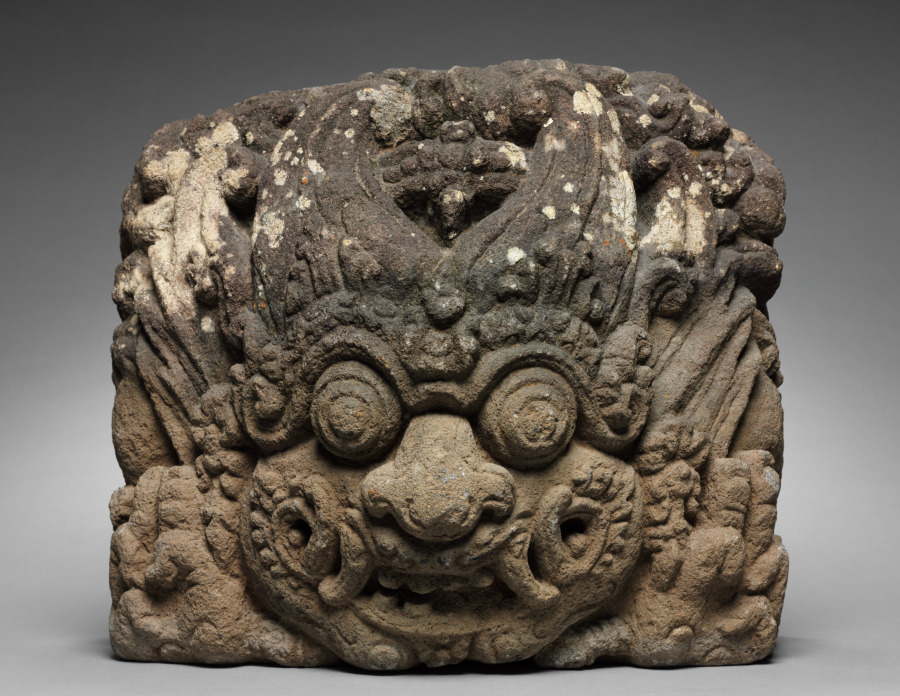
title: Architectural Sculpture: Face of Time (Kala-mukha)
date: 1100s–1300s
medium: volcanic stone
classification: Sculpture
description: The bulging eyes and curved fangs of Kala emphasize the ferocity of the figure who stands for Time and Death, the devourer of all creation. Placed above the entry to an Indonesian temple, Kala serves both to protect the site and indicate a symbolic rebirth for those who pass beneath to enter the sacred space. Though related to the faces of glory on monuments in India, Kala and the volcanic stone from which it has been carved are distinctively Javanese.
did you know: The fiercest looking Kala masks are from eastern Java, made between the 10th to 15th century.